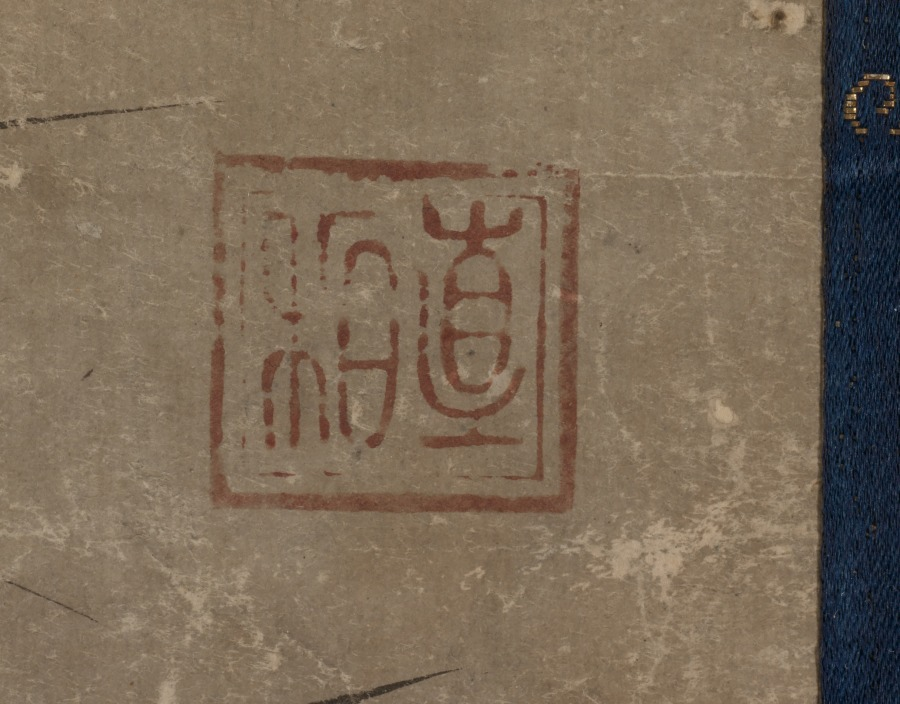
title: Geese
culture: Japan, Edo period (1615–1868)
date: early 1600s to mid-1800s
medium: hanging scroll; ink on paper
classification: Painting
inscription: 「真相」の朱文方印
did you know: This artist is emulating the style of Sōami (d. 1525). A seal on the painting even has one of Sōami's names.